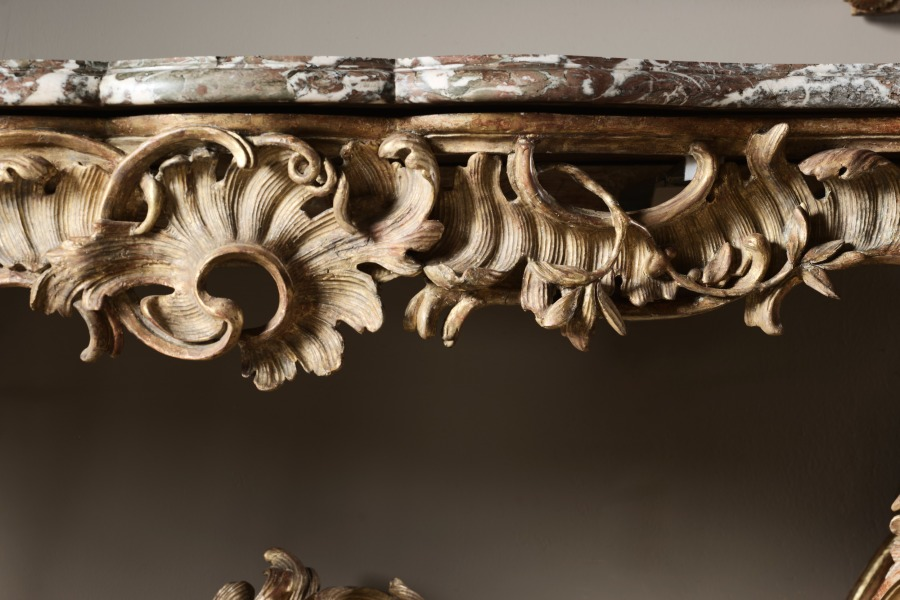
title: Console Table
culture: France, mid-18th Century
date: c. 1730– 1740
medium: gilt wood, marble top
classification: Furniture and woodwork